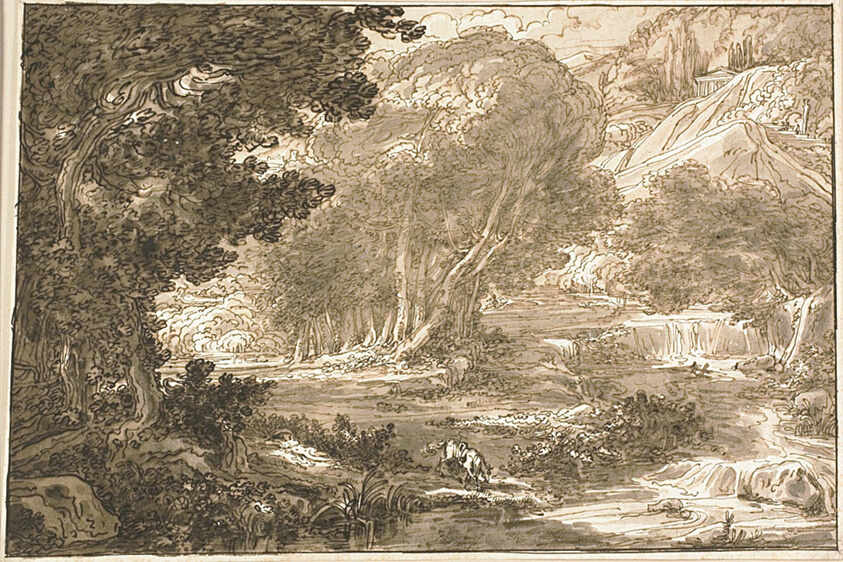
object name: Drawing and Watercolor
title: Angelica Resting Under a Tree, from Orlando Furioso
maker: Felice Giani (Italian, 1758-1823)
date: 1810/13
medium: Pen and brown ink, and brush and brown and gray wash, over graphite, on ivory wove paper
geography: Italy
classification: pen and ink drawings; drawings (visual works); prints and drawing